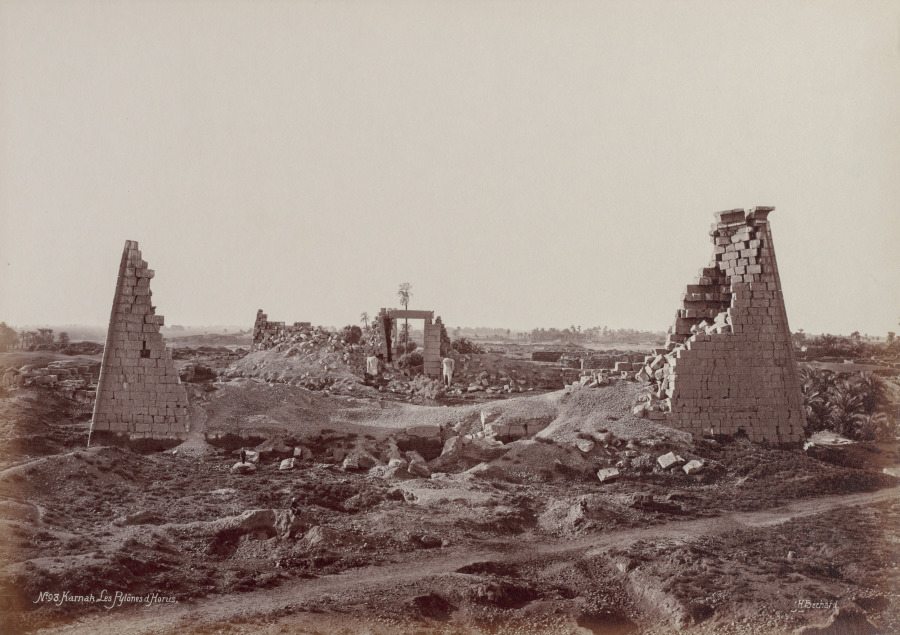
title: Karnak, Les Pylônes d'Horus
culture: France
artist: Henri Béchard (French)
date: 1860s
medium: Albumen print from wet collodion negative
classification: Photograph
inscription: Imprinted in white in lower right corner of image: “H. Béchard”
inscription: Imprinted in white in lower left corner of image: “No. 93 Karnak. Les Pylônes d’Horus.”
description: This desolate view of the remnants of the monumental gateway flanked by figures of the god Horus, usually depicted as a falcon-headed man, emphasizes the sense of discovery that must have been felt by tourists visiting Egypt in the 1860s. A tiny figure at the lower right testifies to the monumental scale of the ruins.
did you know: Karnak is the second most visited tourist site in Egypt after the pyramids of Giza.